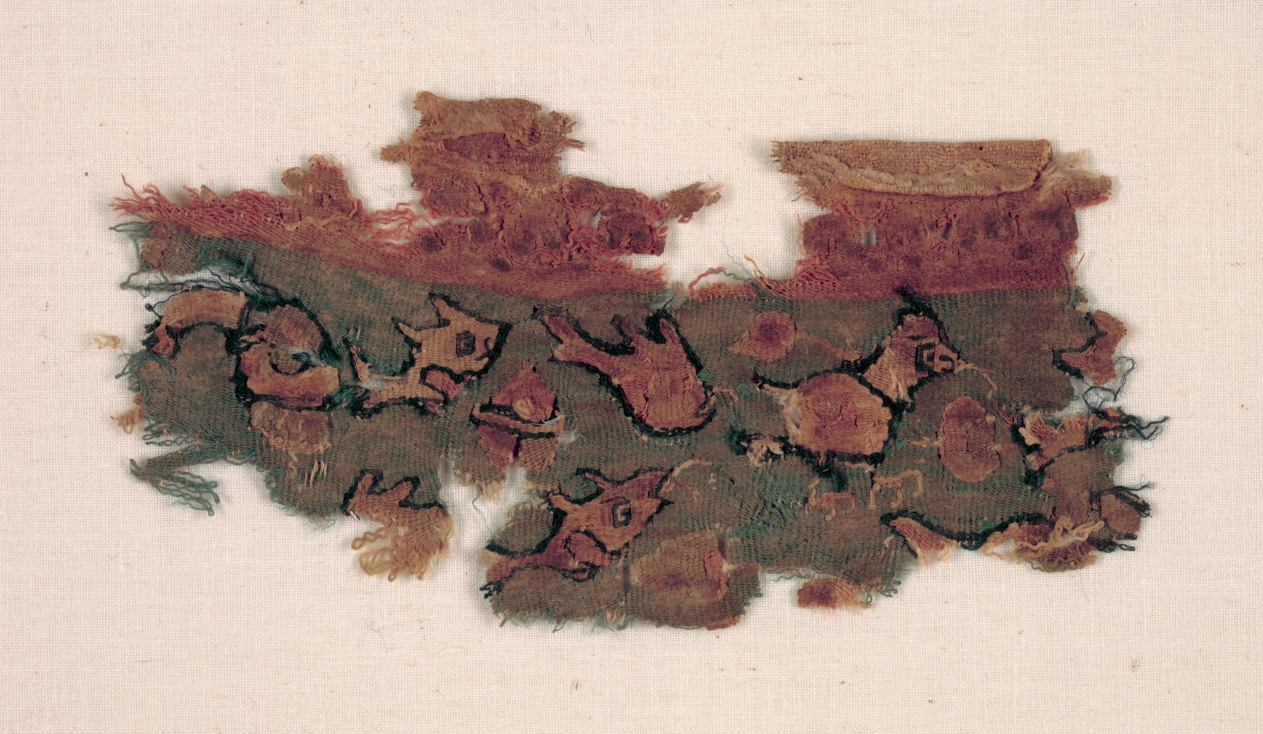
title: Fragment with Fish and Bird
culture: Egypt, Umayyad period (661–750)?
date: 600s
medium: tabby weave with inwoven tapestry ornament, linen and wool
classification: Textile